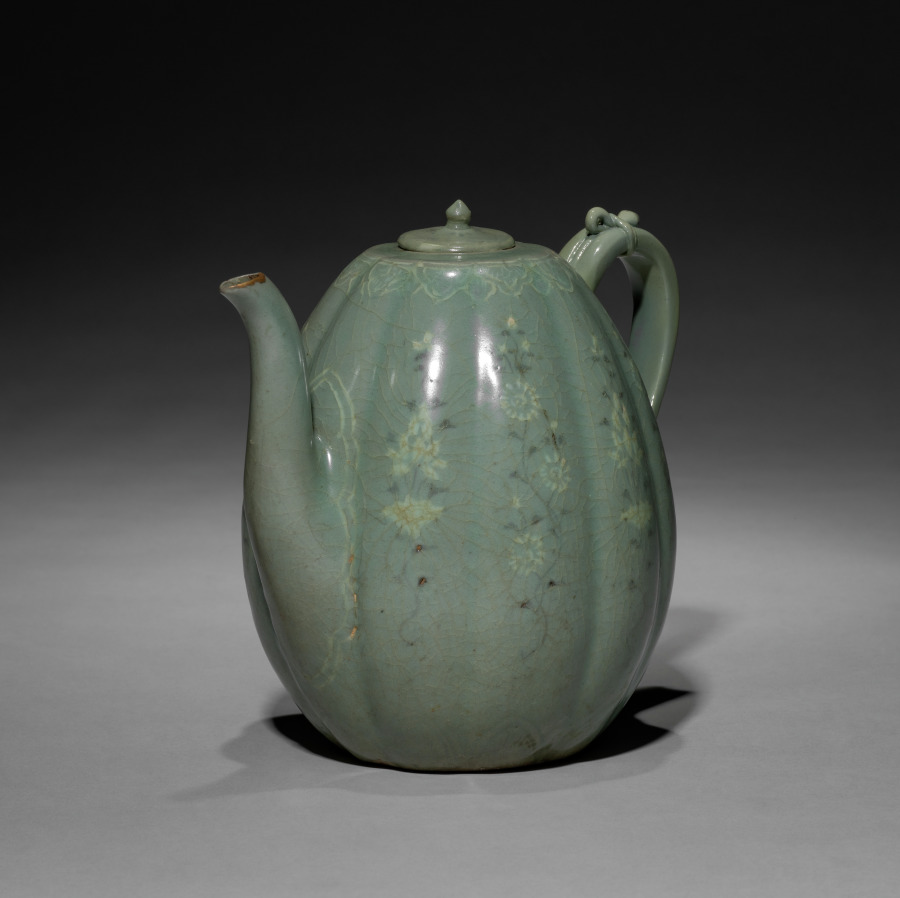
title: Melon-shaped Ewer with Incised Peony Design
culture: Korea, Goryeo dynasty (918–1392)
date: 1200s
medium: pottery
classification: Ceramic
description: This melon-shaped pitcher is adorned with a delicate drawing that renders chrysanthemum buds with full blossoms in white and black inlays. In Korea, chrysanthemum flowers and leaves were made into both tea and wine. Chrysanthemum wine was enjoyed during the the Double Nine Festival (the ninth day of the ninth month in the lunar calendar) when praying for longevity.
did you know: The shape of this pitcher resembles a type of yellow muskmelon cultivated mainly in East Asia.